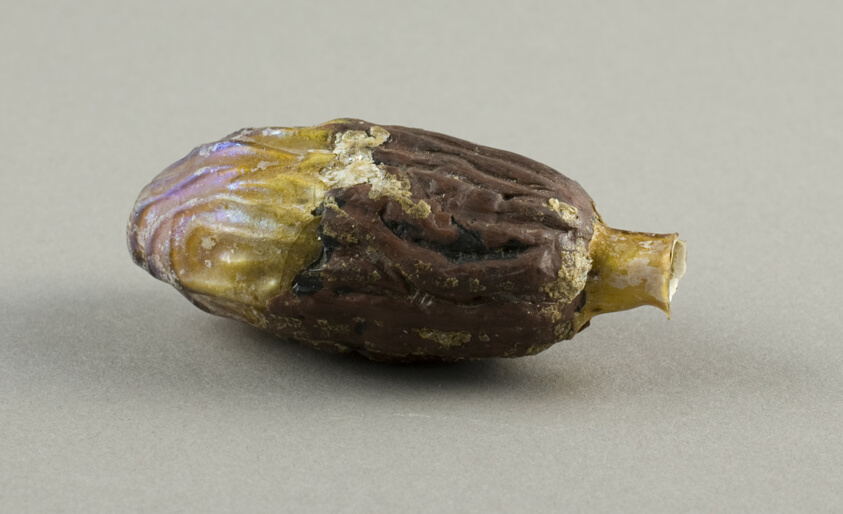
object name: Vessel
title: Bottle in the Shape of a Date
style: syrian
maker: Roman; Levant or Syria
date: 2nd century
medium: Glass, mold-blown technique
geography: Syria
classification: bottle; glass; vessel; ancient art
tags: bottles, fruit